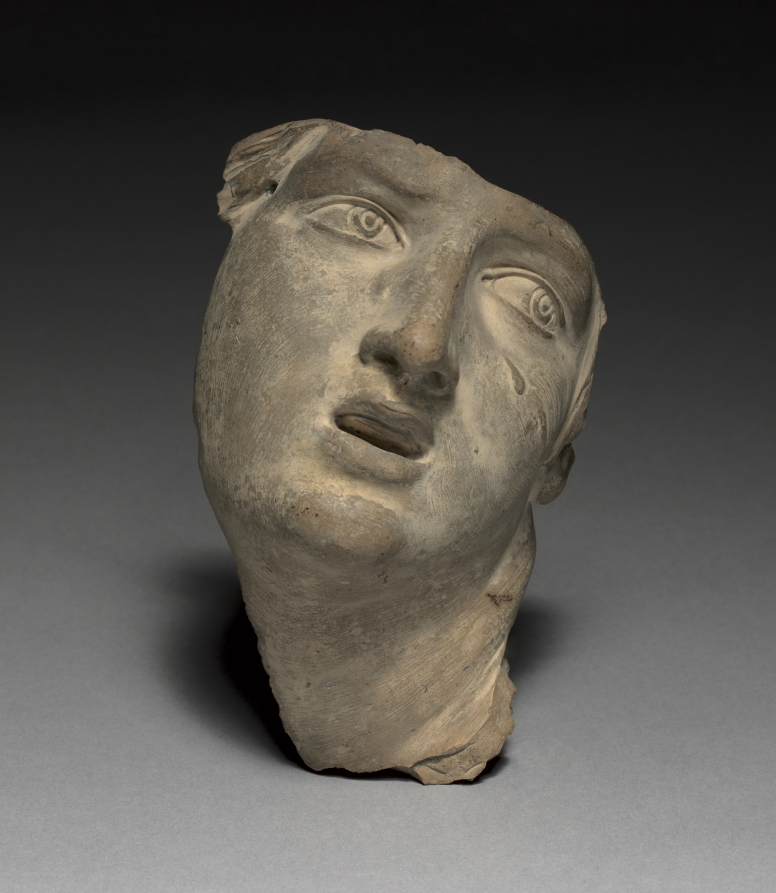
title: Head of Proserpina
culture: Italy, 17th century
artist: after Gian Lorenzo Bernini (Italian, 1598–1680)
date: 1650– 1700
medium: terracotta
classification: Sculpture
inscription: penciled inscription on neck: "Palazzo Bernini / 1839"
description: This work was long thought to be a fragment of a preliminary study for a large-scale marble sculpture by Gian Lorenzo Bernini in Rome depicting Pluto, the god of the underworld, dragging Proserpina away to be his wife. Bernini’s finished studies never had the scrape marks visible on the cheek, indicating another sculptor’s hand. The work was owned by Bernini’s family, and his many studio assistants often copied his work. This terracotta therefore may be by one of the more significant sculptors of this group. The subject conveys fleeting expressions of sadness, fear, and surprise, and would have interested sculptors learning to convey complex emotions.